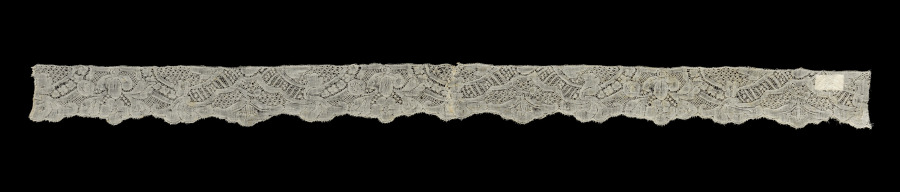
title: Lace Edging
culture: Belgium, Binche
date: 1700s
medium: Linen: bobbin lace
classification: Lace